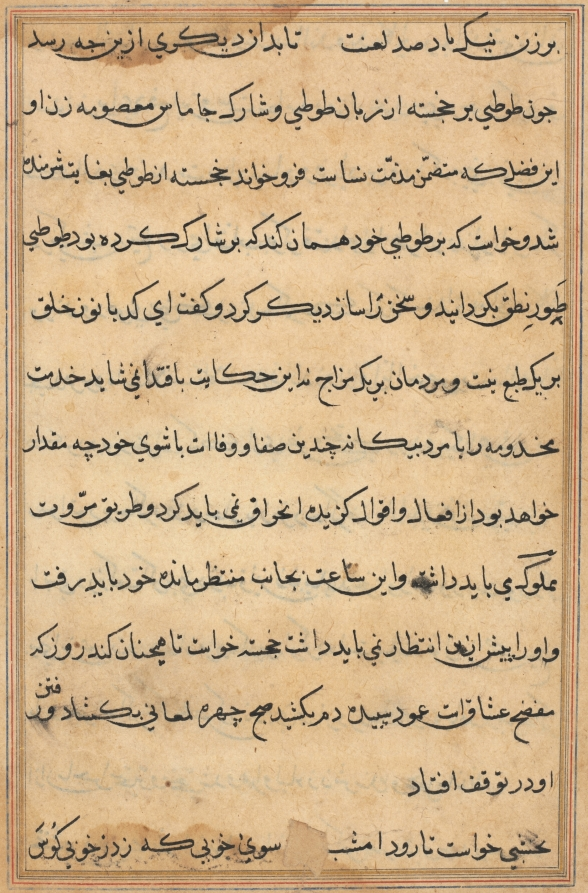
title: Page from Tales of a Parrot (Tuti-nama): text page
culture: Mughal India, court of Akbar (reigned 1556–1605)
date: c. 1560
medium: gum tempera, ink, and gold on paper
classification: Painting